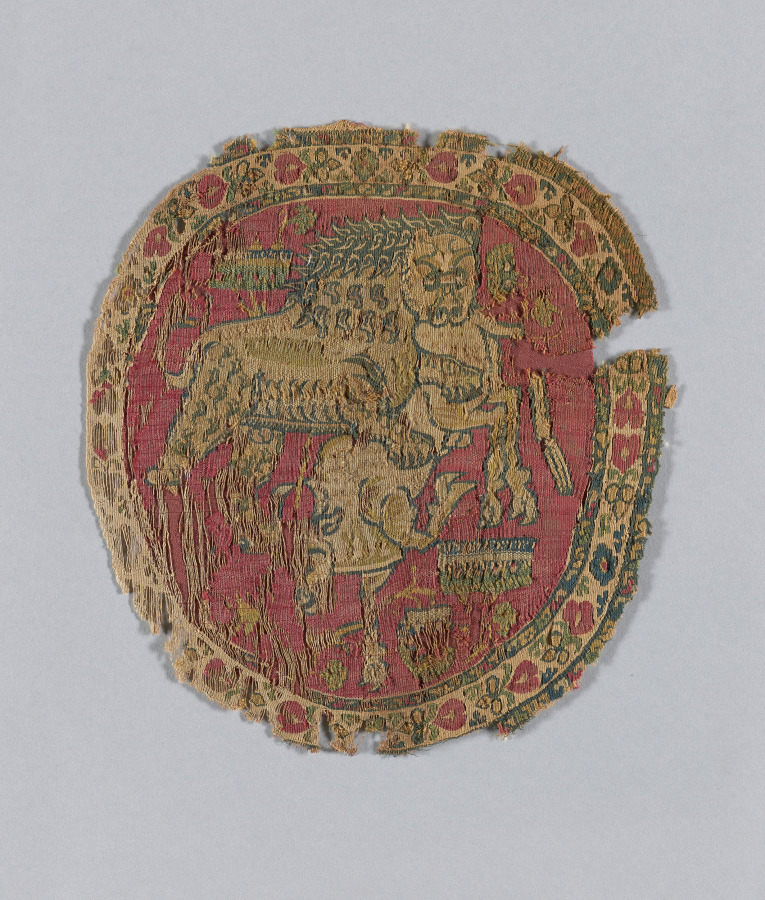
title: Segmentum from a Tunic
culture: Egypt, Abbasid period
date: 750–99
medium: tapestry; linen and wool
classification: Textile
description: A fierce lion with a pronounced mane takes down a large bull on a purple red ground with stylized trees and plants. Both animals appear to be facing us, the viewer. The border displays a formal wreath of rosettes. This roundel, or circular decorative element, and two additional matching examples suggest that they originally decorated the front and back of a tunic. The scene may be an abbreviated reference to the royal hunt, one of the pleasures of the court that served as propaganda to legitimize the sovereignty of rulers by confirming their ability to control natural resources.